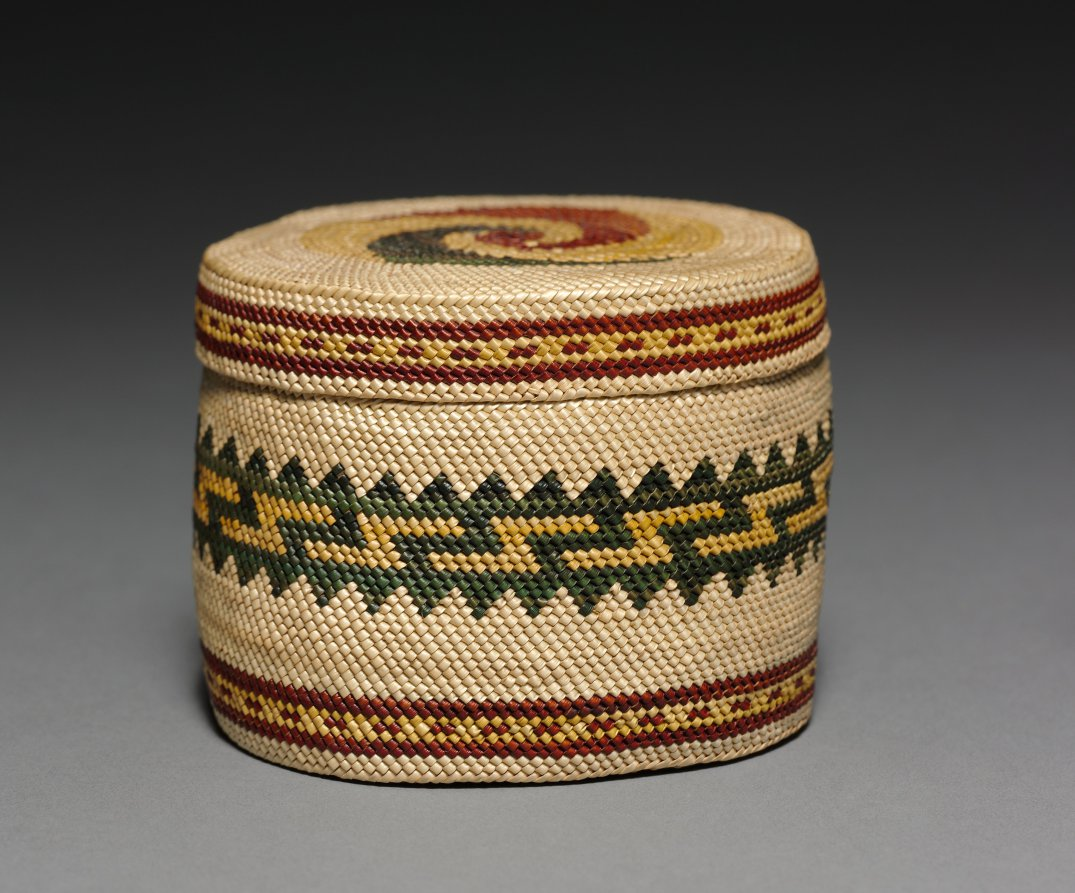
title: Covered Bowl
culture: Northwest Coast, Makah, late 19th-early 20th century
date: c. 1875–1925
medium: twined grasses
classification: Basketry